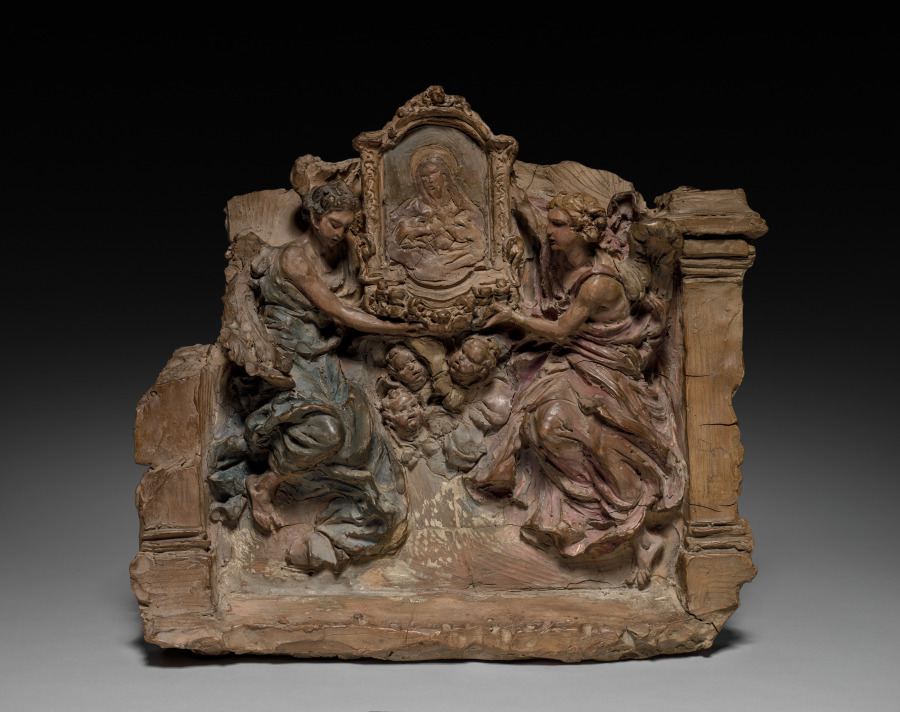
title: Two Angels and Cherubs Bearing an Icon of Christ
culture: Italy, Rome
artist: probably by Paolo Naldini (Italian, 1616–1691)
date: c. 1670–80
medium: terracotta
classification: Sculpture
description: This work is probably a study for a large altarpiece that would have combined several materials, including marble, stucco, and paint. The artist modeled his design in soft clay, which was then hardened by firing; subtle tints suggest the richness of the finished work. The idea of using sculptural figures to support a painted image within an altarpiece was influenced by the work of the Roman sculptor Gian Lorenzo Bernini (1598–1680), with whom Naldini is known to have worked.